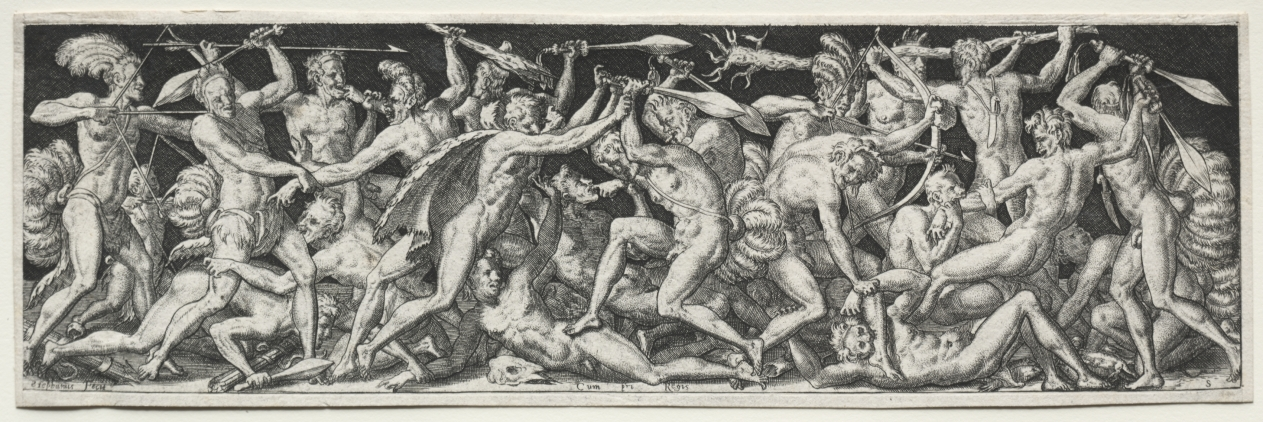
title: Combats and Triumphs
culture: France, 16th century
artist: Etienne Delaune (French, 1518/19-c. 1583)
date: c. 1550–72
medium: engraving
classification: Print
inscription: lower right, in plate: S[backwards]tephanus Fecit ; lower center, in plate: Cum pri Regis ; lower right, in plate: S ; verso, lower right, in graphite: 287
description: Etienne Delaune (French, 1518/19-1583) Combats and Triumphs, probably 1560s Engravings Gift of Leonard C. Hanna 1924.671-.674 The Triumph of Bacchus Battle of Men and Animals Combat of the Naked Men Battle of the Centaurs and the Lapiths The four prints shown here come from a series of twelve known as the Combats and Triumphs. The friezelike composition reflects the artist's study of marble relief carvings on Greek and Roman sarcophagi (coffins), here reduced to a preciously small setting. Against a flat, stagelike background, Delaune's balletic warriors engage in a Mannerist version of artificial war. Etienne Delaune was inspired by the art created at Fontainebleau, but he worked in Paris and then Strasbourg during the late 1500s. His small, exquisitely executed engravings reflect his training as a goldsmith and his work as a medallist.